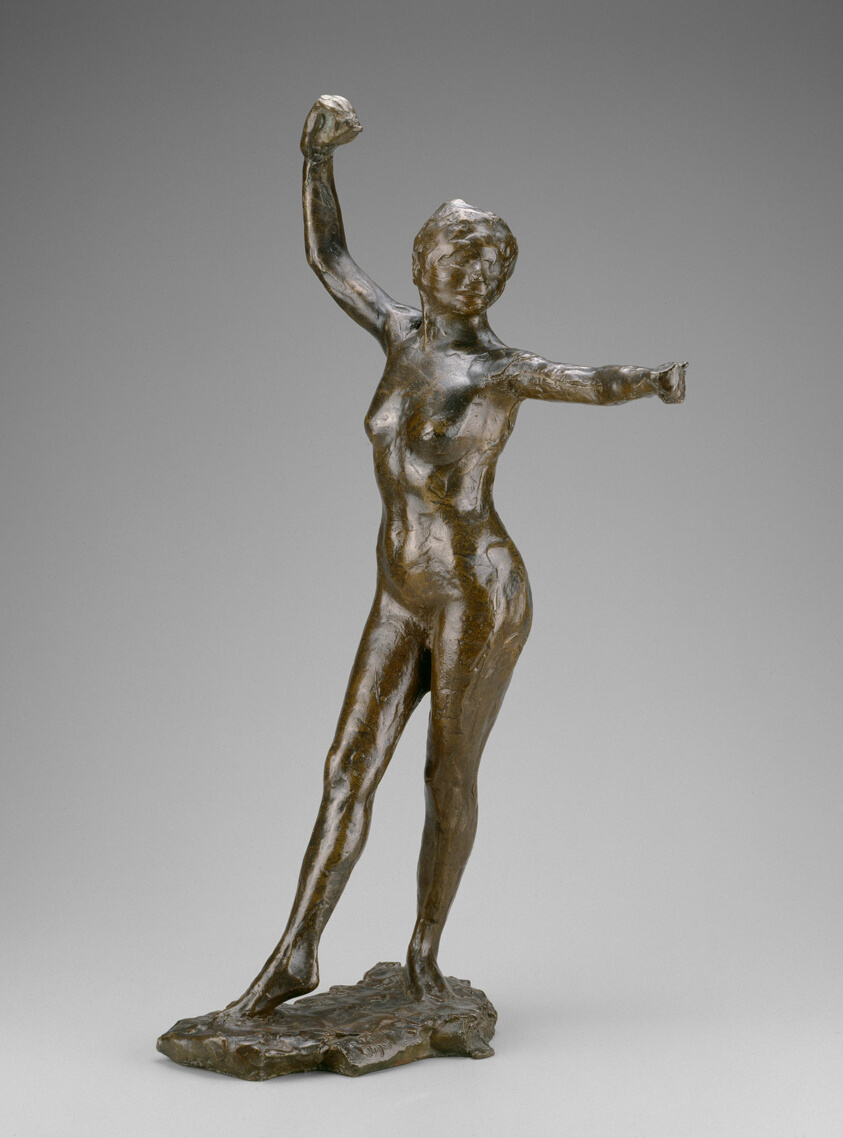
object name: Sculpture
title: Dancer Ready to Dance, Right Foot Forward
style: Impressionism, nineteenth century, 19th century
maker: Edgar Degas (French, 1834–1917)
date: Modeled 1882–95; cast 1919/21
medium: Bronze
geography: France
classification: statuette; french; figure; sculpture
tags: dancers, woman, nudes, ballet, women